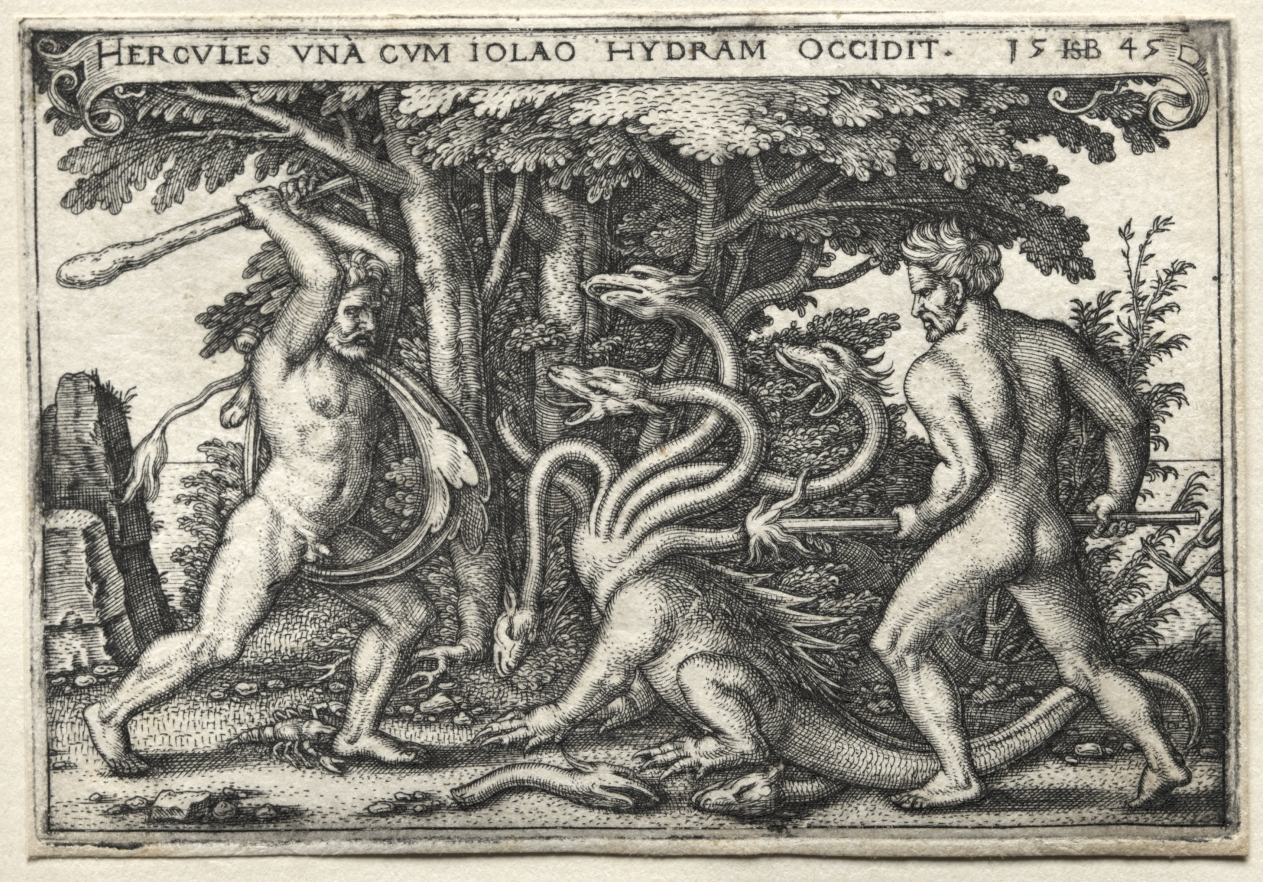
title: The Labors of Hercules: Hercules Killing the Lernean Hydra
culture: Germany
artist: Hans Sebald Beham (German, 1500–1550)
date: 1545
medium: engraving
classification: Print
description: Hercules and his nephew Iolaus work together to defeat the multiheaded hydra of Lerna. To stop the hydra from regrowing its heads, Iolaus torches each neck as Hercules removes the head with his club. Meanwhile, a lobster aids the hydra by attacking Hercules’s heel. According to legend, Hercules dipped his arrowheads in the dead hydra’s blood to make them poisonous. Beham was one of several German printmakers referred to today as the “Little Masters.” They established their artistic prowess by engraving remarkably small prints, appealing to collectors fascinated with miniature objects and curiosities.